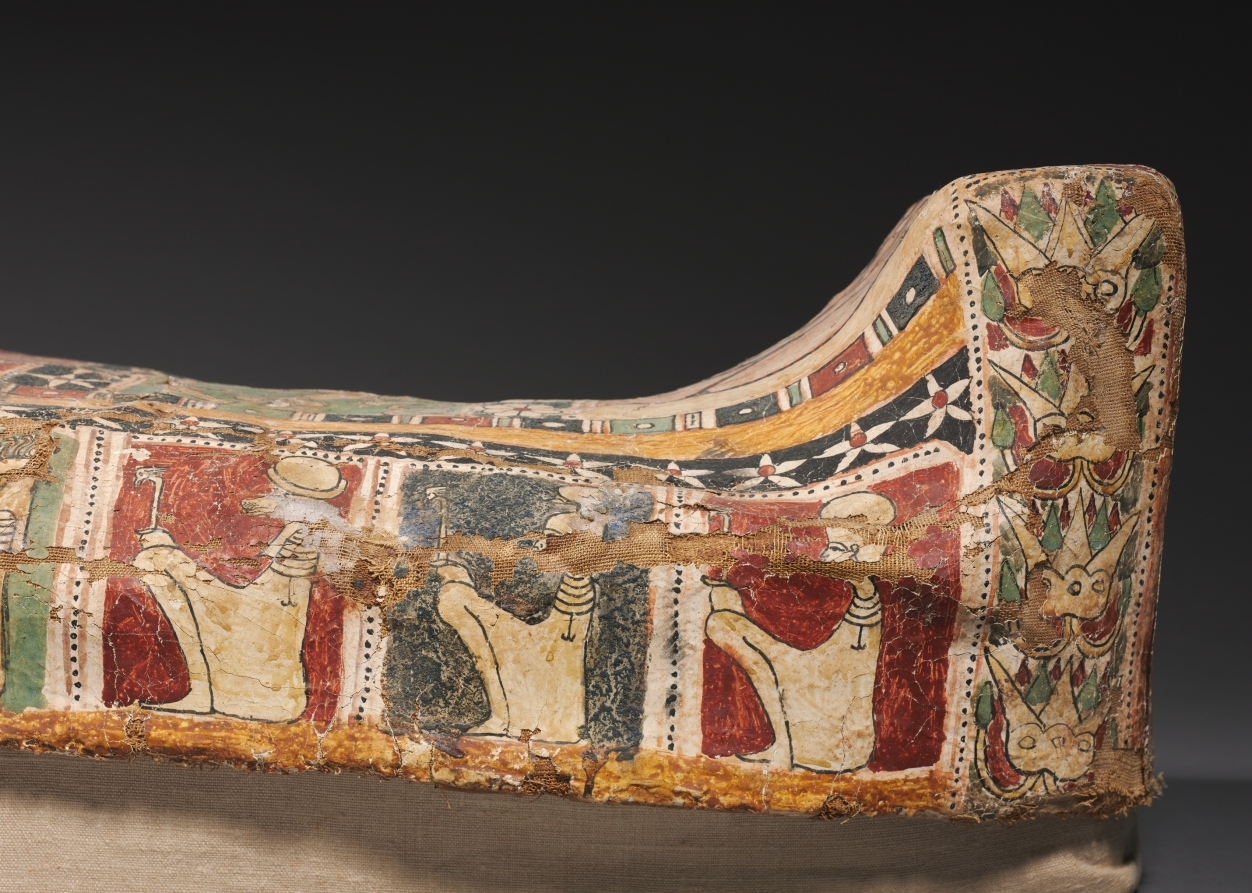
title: Cartonnage Mummy Case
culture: Egypt, Greco-Roman period (332 BCE–395 CE), Ptolemaic dynasty (305–30 BCE)–Roman empire (30 BCE–395 CE)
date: c. 50 BCE–50 CE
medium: cartonnage, painted and gilded, with glass inlays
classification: Funerary Equipment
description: This mummy case is made of cartonnage, a material similar to papier-mâché, but using layers of linen rather than paper. Cartonnage mummy cases such as these are contemporary with funerary portraits painted on wood or linen, although they present a very different appearance. The face, modeled in plaster, is bland and idealized, although the effect of the gilding and glass inlays is quite dazzling. The body is painted with traditional, age-old funerary motifs: the god Osiris, seated and mummiform; the fetish of Abydos, holy city of Osiris, flanked by standing deities (Thoth and Shu); a Horus falcon with outspread wings, and the bark of Sokar. Below these are the sandaled feet of the deceased. On the sides are rows of seated deities. On the top of the head are a winged scarab beetle flanked by Anubis jackals. On the foot are painted the soles of the deceased’s sandals, flanked by scorpions for protection.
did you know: This coffin is smaller and later in date than the other coffins in this gallery. It is made of cartonnage, which used layers of linen to create a material similar to papier-mâché. The painted portrait head displays the influence of Roman portraiture at this time and incorporates both gilding and glass inlays. Despite the fragile materials, this mummy case survived due to the very dry desert climate in which it was found.